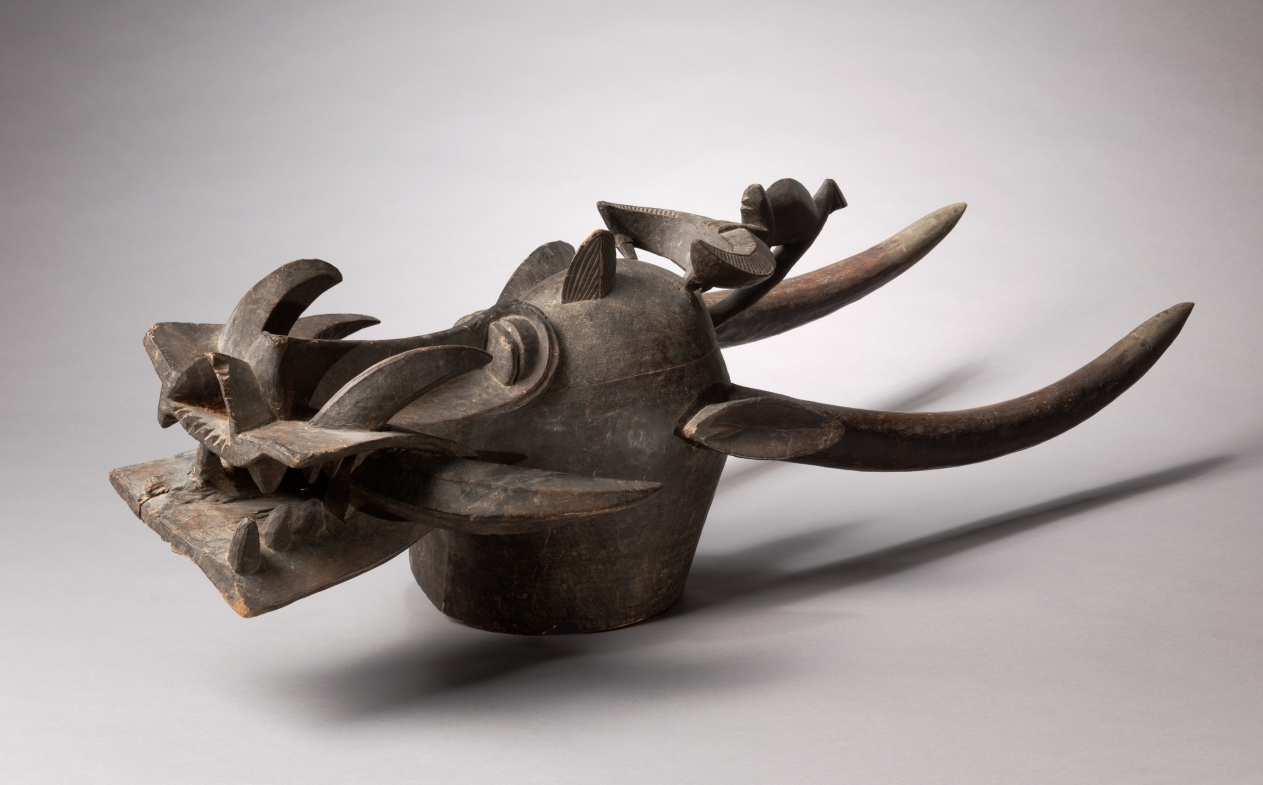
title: Helmet Mask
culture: Western Sudan, Ivory Coast, Senufo, 20th century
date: early to mid-1900s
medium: wood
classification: Mask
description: The iconography of this helmet mask is comprised of sculpted renderings of different animal attributes including a ram's horns, a warthog's tusks, a crocodile's mouth, and a hyena's snout. Carved between the long antelope horns is a miniature chameleon that holds an abstract wing-shaped motif called mangele. Intended to impress and terrify, the sculpture's fearsome aesthetic alludes to the mask's power as an anti-sorcery device.